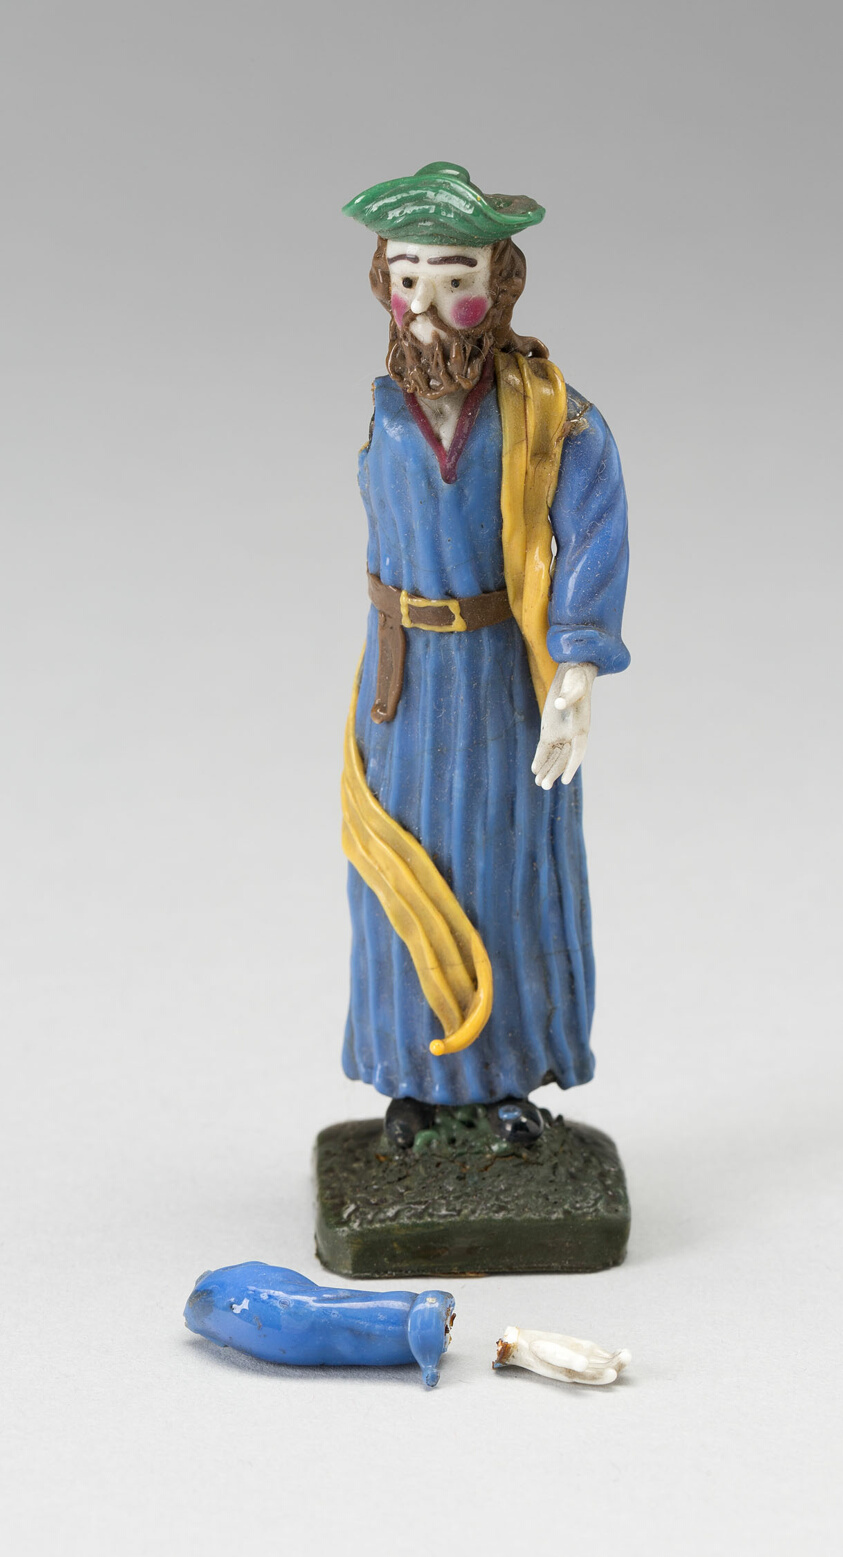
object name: Glass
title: Man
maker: Nevers, France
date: 18th century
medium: Glass; lampwork (verre de Nevers), metal armature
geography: France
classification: decorative object/ornament; lampwork; glass; european decorative arts